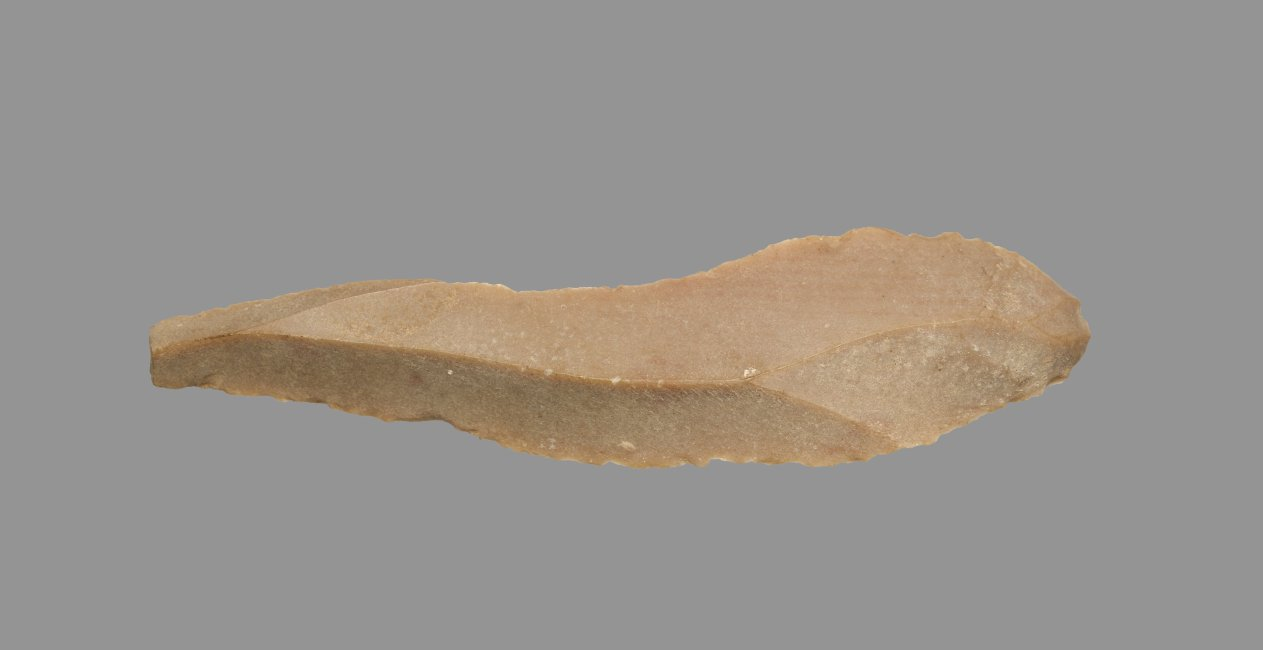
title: Sickle Blade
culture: Egypt, Middle Kingdom (2040–1648 BCE), Dynasty 12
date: 1980–1801 BCE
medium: flint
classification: Implements